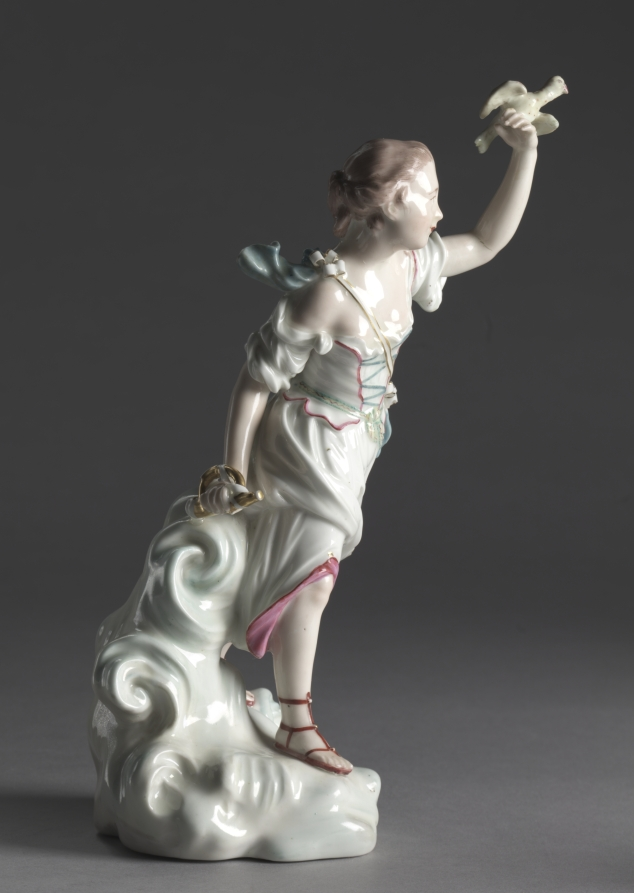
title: Air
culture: England, Derby, 18th century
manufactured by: Derby Porcelain Factory (Chelsea-Derby Period, 1770–84)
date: c. 1775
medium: soft- paste porcelain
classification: Ceramic